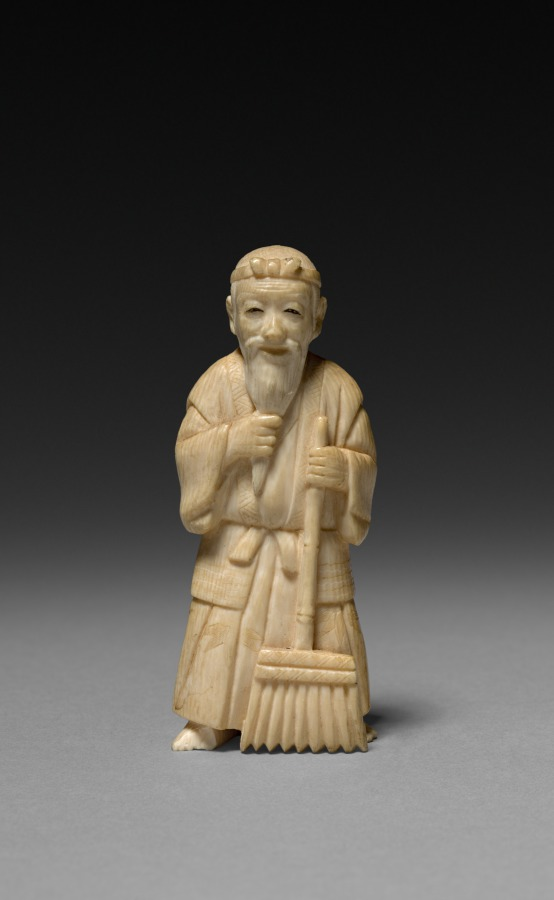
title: Japanese Man with Rake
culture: Japan, Meiji period (1868–1912)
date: early 1900s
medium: ivory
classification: Ivory